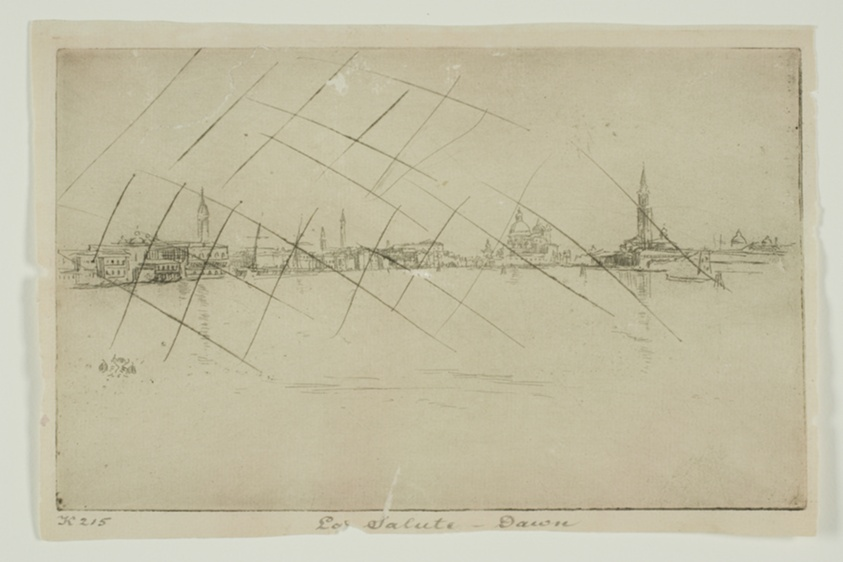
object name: Print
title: La Salute: Dawn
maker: James McNeill Whistler (American, 1834-1903)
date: 1879/80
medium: Etching and drypoint with foul biting, with drypoint cancellation, in black ink on ivory laid paper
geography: United States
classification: etching; print; prints and drawing; foul biting; drypoint; paper